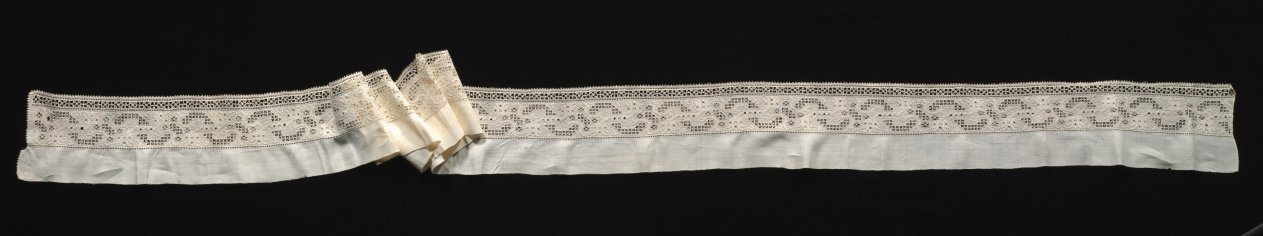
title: Lace Band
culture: Italy, 1600s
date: 1600s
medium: Linen: needle lace (cutwork and reticella) and embroidery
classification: Lace